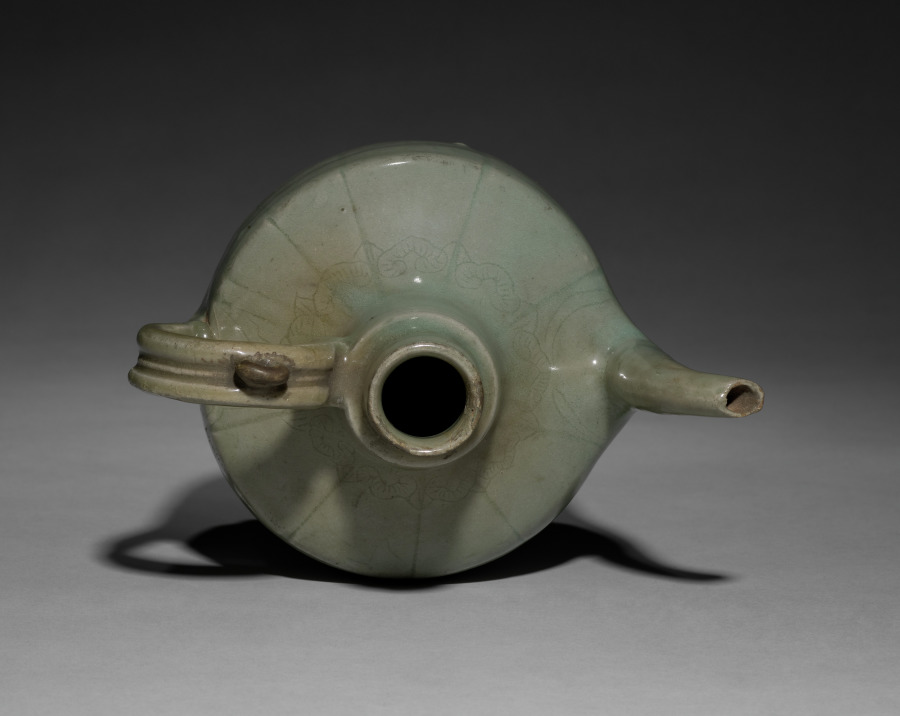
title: Wine Pot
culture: Korea, Goryeo dynasty (918–1392)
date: 918–1392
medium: pottery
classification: Ceramic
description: As early as the seventh century, the practice of drinking tea and wine became an important part of elite culture in Korea. Elites of the Goryeo period commissioned a variety of types of utensils and vessels including this elegant wine pot, not only to make their drinking experience more exciting, but also to show their appreciation of nature.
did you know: A chain or cord once connected a small loop on the handle and the lid to serve beverages without spilling.